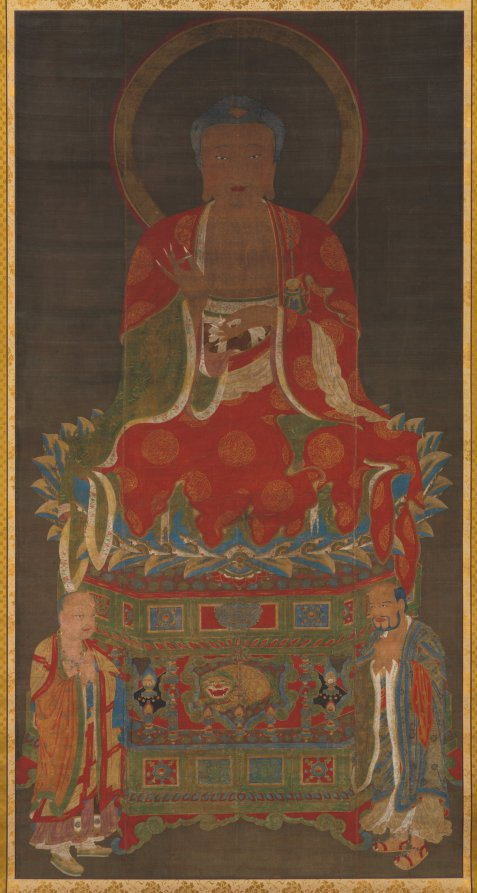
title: Shakyamuni with two attendants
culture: China, Yuan (1271-1368) or early Ming dynasty (1368-1644)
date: 1300s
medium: Hanging scroll; ink, color, and gold on silk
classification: Painting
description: The historic Buddha Shakyamuni is seated on an elaborately decorated pedestal and flanked by two attendants making gestures of devotion. The unknown artist used gold and deeply hued pigments to depict the luxurious fabrics, particularly the golden medallions of swirling dragons and clouds on the Buddha’s red robe. The painting itself is mounted in a Buddhist style with two tiers of fine silk borders. The inner border of gold brocade on a cream background surrounds the painting. The outer border is yellow silk; decorative silk strips, called futai, dangle from the top hanging bar.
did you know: This painting was made on 3 vertical panels of silk stitched together. The joins are visible just outside of Shakyamuni's left and right shoulders.